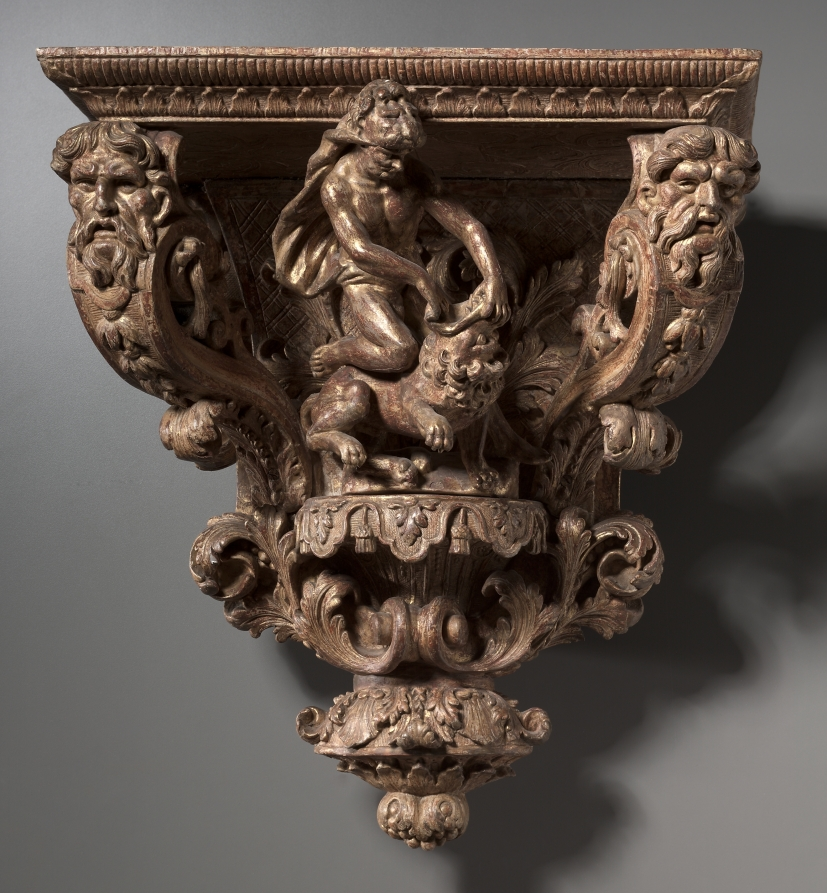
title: Wall Bracket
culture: France, 17th century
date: c. 1650–75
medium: carved and gilt wood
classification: Furniture and woodwork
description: The carved decoration depicts Hercules and the Nemean lion.